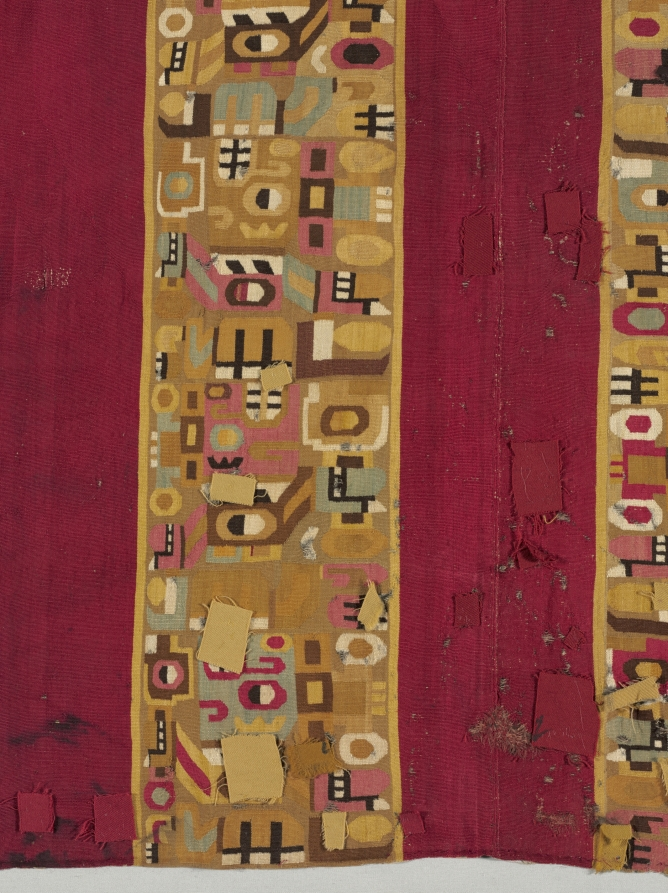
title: Tunic with Sacrificer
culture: South America, Peru, Central Andes, Middle Horizon, Wari people, 7th-11th century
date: 600–1000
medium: camelid-fiber, cotton; tapestry weave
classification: Textile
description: An extremely abstract supernatural sacrifice repeats in different colors and orientations across the body of this tunic, which was shortened on one side in antiquity. Look for the toothy black-and-white mouth in the sacrificer's upward-gazing head; other facial features include a button nose and a vertically divided eye. The figure holds the L-shaped haft of an axe behind its back and, at the front of its body, a short staff with a severed, upside-down human head on the top.